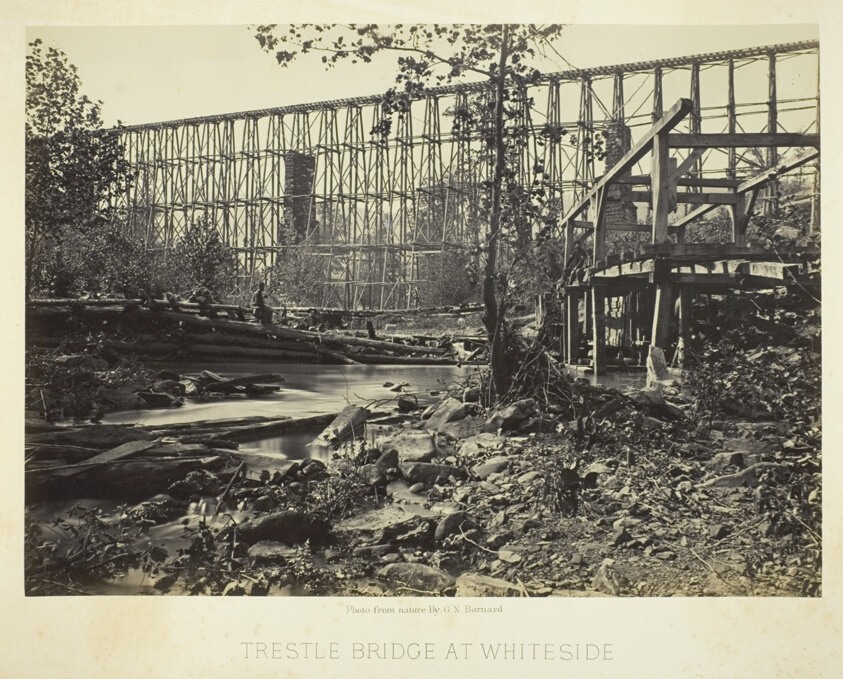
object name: Photograph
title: Trestle Bridge at Whiteside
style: 19th century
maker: George N. Barnard (American, 1819–1902)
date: 1864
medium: Albumen print, plate 4 from the album "Photographic Views of the Sherman Campaign" (1866)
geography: United States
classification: albumen silver print; photographic process; photography; photograph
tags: Collected by Hugh Edwards, Sherman's Campaign 1866